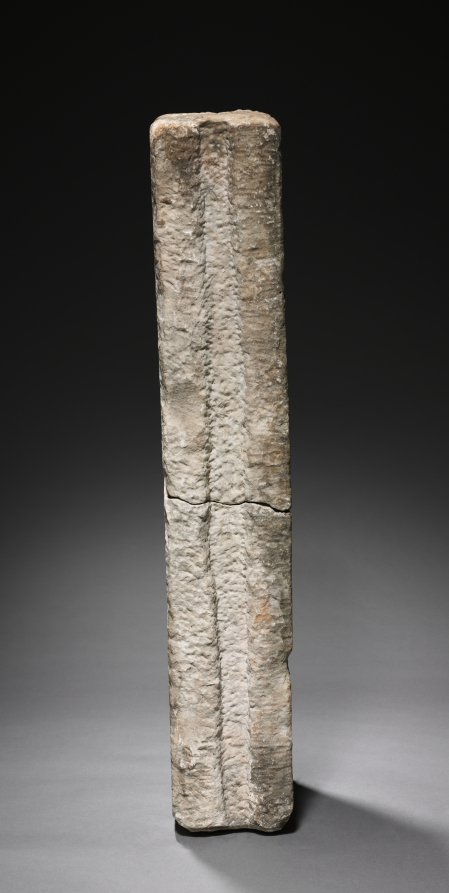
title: Transenna Post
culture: Lombardic, Italy, Rome, Migration period, 8th-9th Century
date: 700s-800s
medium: marble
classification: Sculpture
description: In Christian architecture a transenna is an openwork screen of stone or metal enclosing a shrine. These transenna elements were found in Rome; the posts were said to have been excavated on the Coelian Hill and may have originally formed part of the transenna of the Church of San Saba. The Lombards were an ancient Germanic-speaking tribe that settled in Italy after 568. Their artistic tradition was originally centered on small objects of personal adornment like buckles and brooches. After occupying Italy, the Lombards found themselves in contact with large-scale sculpture of classical and early Christian origin that, by the end of the 700s, they had learned to adopt and imitate, as seen here.